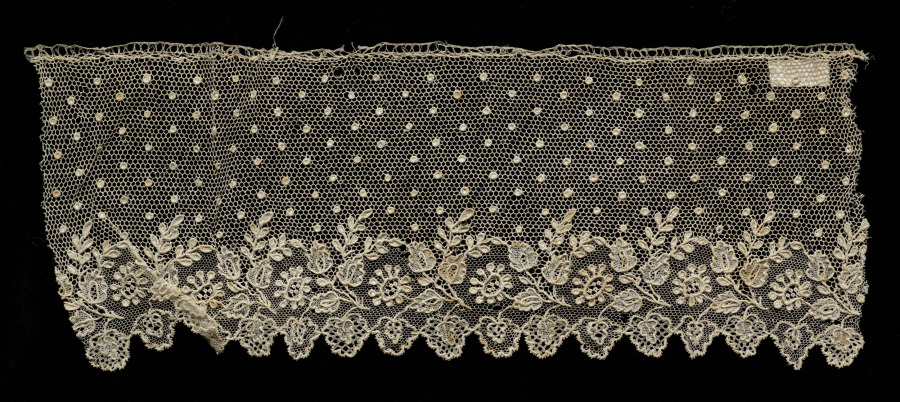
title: Lace Edging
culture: France, Alençon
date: 1700s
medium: Linen: needle lace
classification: Lace